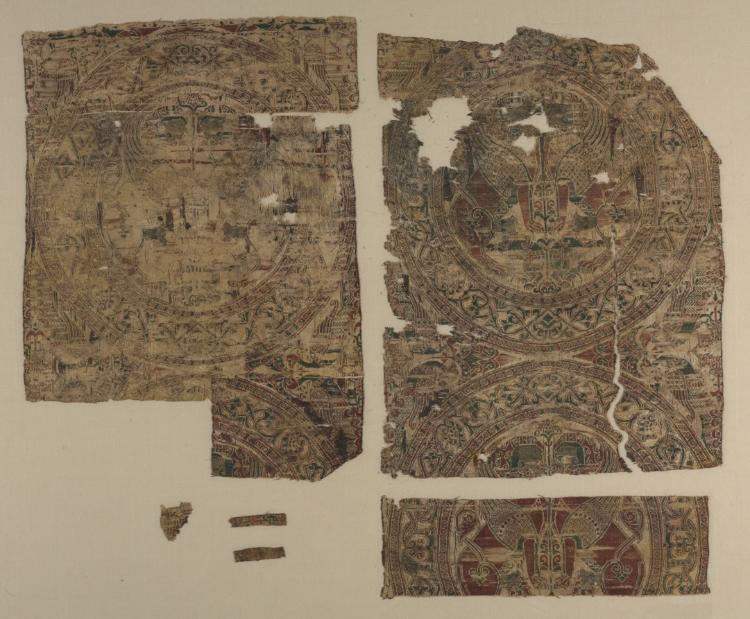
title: Fragment with confronted sphinxes in roundels from the tomb of Saint Bernard Calvo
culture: Spain, Almeria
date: 1200–43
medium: Silk and gold thread: lampas, taqueté, and plain-weave variant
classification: Textile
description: Composite creatures, such as winged lions and sphinxes, predate the rise of Islam in the Arabian Peninsula. Islamic textiles continued to include them for centuries after the Arab conquest of Spain. Pairs of lions with gold faces rear up to bite the haunches of the winged beasts. In between the roundels are pairs of peacocks, motifs traceable to pre-Islamic Persian art that spread throughout the Islamic world, including Spain. The body of Saint Bernard Calvo, the Catholic Bishop of Vich in 1233–43, was wrapped in textiles, including these fragments that still retain traces of his blood.